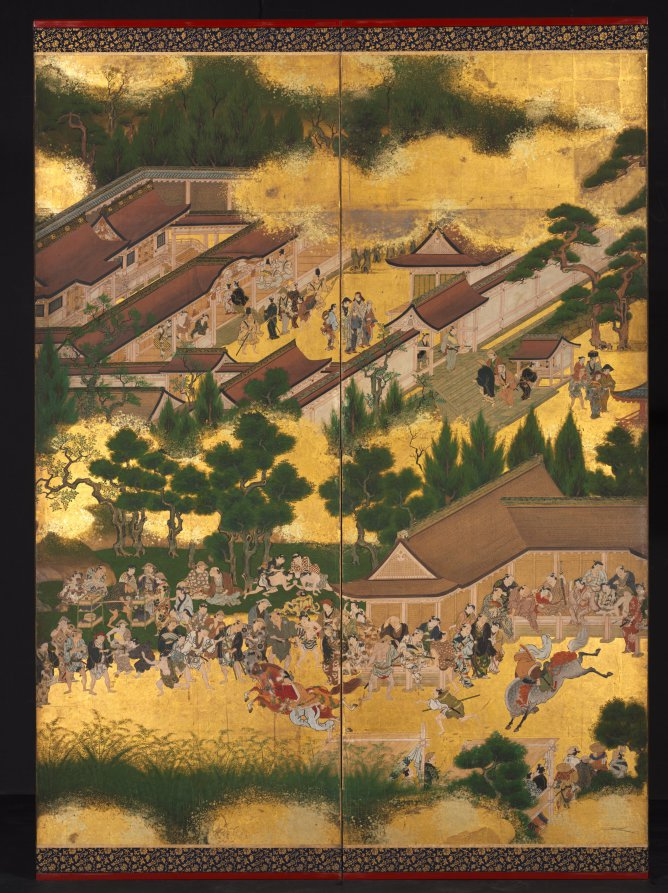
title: Horse Race at the Kamo Shrine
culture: Japan, Edo period (1615–1868)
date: early to mid-1600s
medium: One of a pair of six-panel folding screens; ink and color on gilded paper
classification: Painting